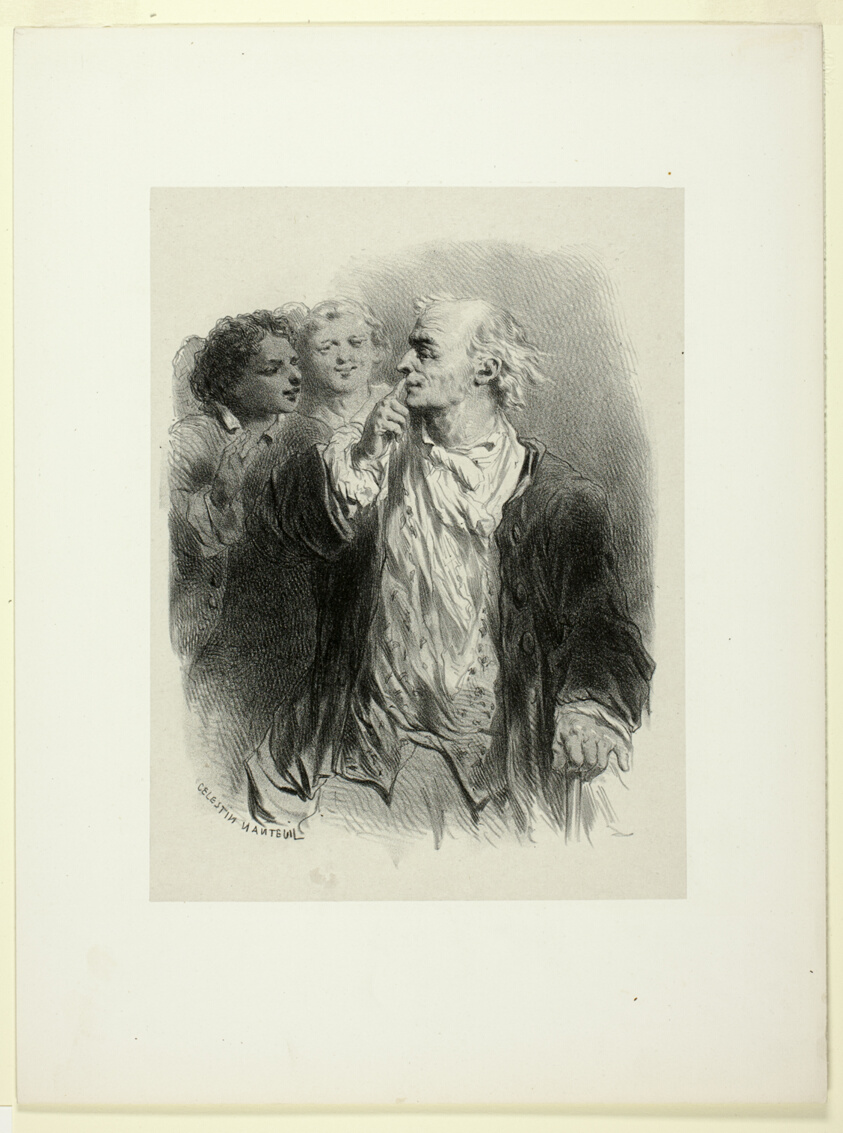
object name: Print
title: A Gentleman and Two Companions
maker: Celestin Nanteuil (French, 1813-1873)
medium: Lithograph in black on gray wove chine, laid down on ivory wove paper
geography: France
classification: lithograph; print; prints and drawing